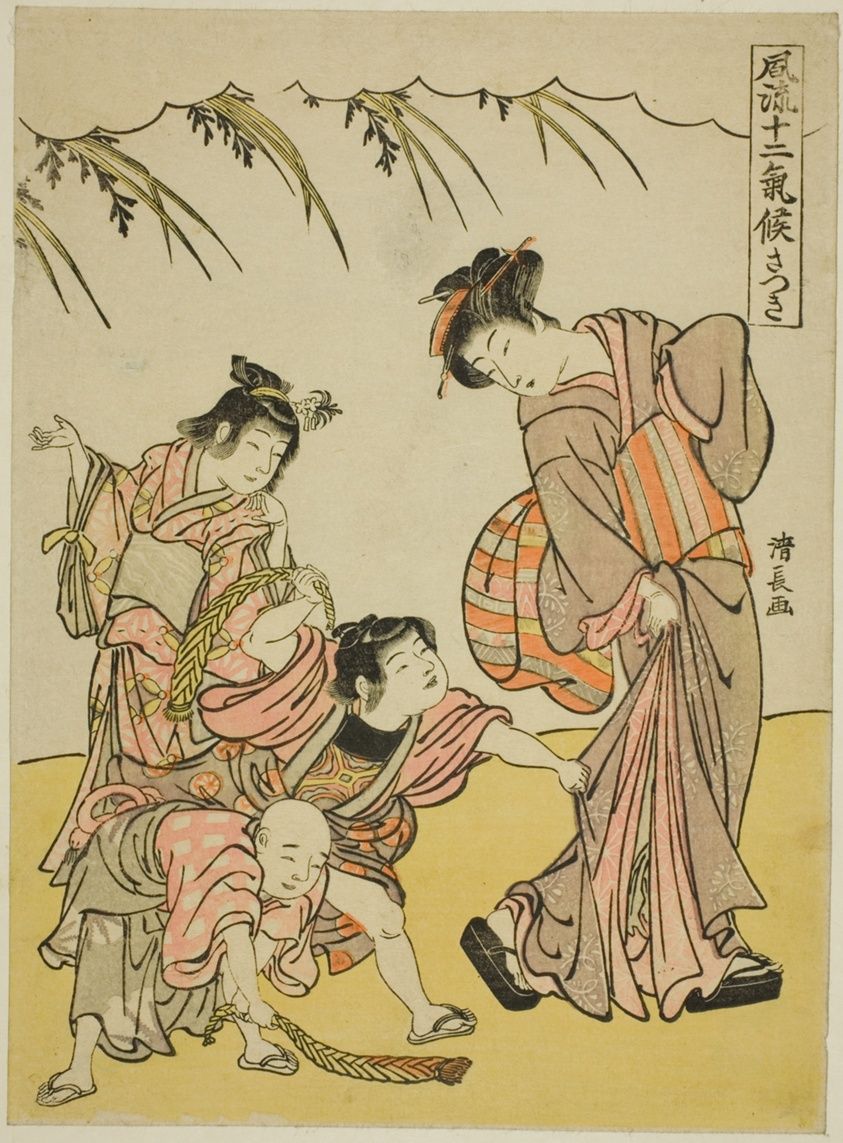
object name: Print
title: The Fifth Month (Satsuki), from the series "Fashionable Twelve Seasons (Furyu juni kiko)"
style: Japanese (culture or style)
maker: Torii Kiyonaga (Japanese, 1752-1815)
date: c. 1779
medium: Color woodblock print; chuban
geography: Japan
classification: woodblock print; print; asian art